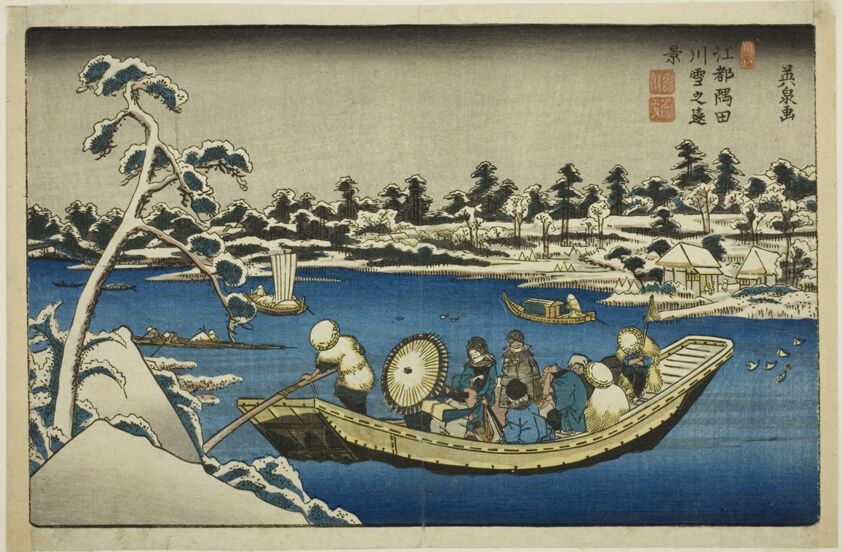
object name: Print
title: Distant View of Snow on the Sumida River in Edo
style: Japanese (culture or style)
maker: Keisai Eisen (Japanese, 1790-1848)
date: c. 1840/44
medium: Color woodblock print; oban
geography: Japan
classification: woodblock print; print; asian art